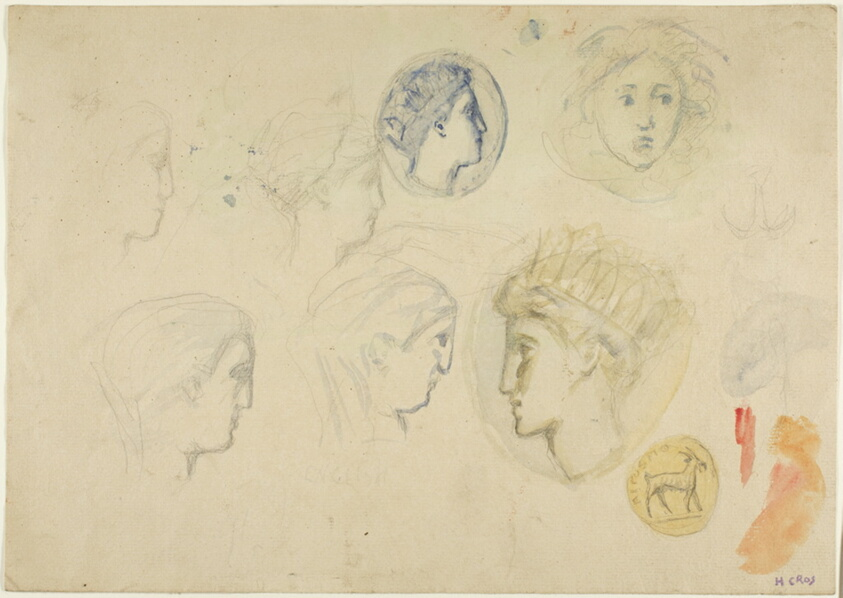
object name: Drawing and Watercolor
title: Sketches: Profile Heads, Coins or Medals (recto); Trees (verso)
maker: Henri Cros (French, 1840-1907)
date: c. 1885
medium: Watercolor and graphite on cream laid paper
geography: France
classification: watercolor; drawings (visual works); prints and drawing